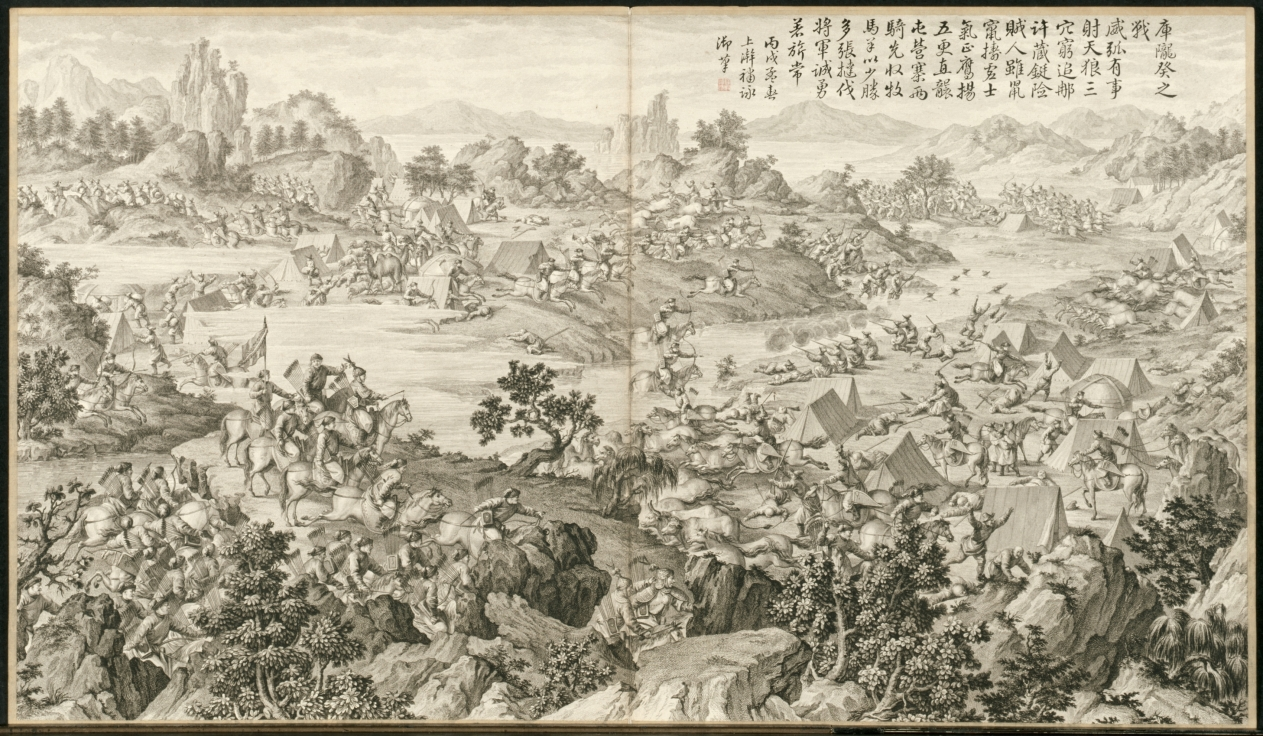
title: Battle of Kulongkui: from Battle Scenes of the Quelling of Rebellions in the Western Regions, with Imperial Poems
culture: China, Qing dynasty (1644–1911), Qianlong reign (1736–95)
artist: Jean Damascene Sallusti (Italian, d. 1781)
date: c. 1765–74; poem dated 1766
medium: etching, mounted in album form, 16 leaves plus two additional leaves of inscriptions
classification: Print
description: This set of etchings was commissioned by Emperor Qianlong to record in pictorial terms the courage of his generals and soldiers in quelling the rebellions in the Western Regions. Qianlong added his own poem to each of the etchings, indicating his appreciation and pride in this demonstration of military might. "Western Regions" refers to the present-day Xingjiang province, often described in Western writing as "Central Asia."